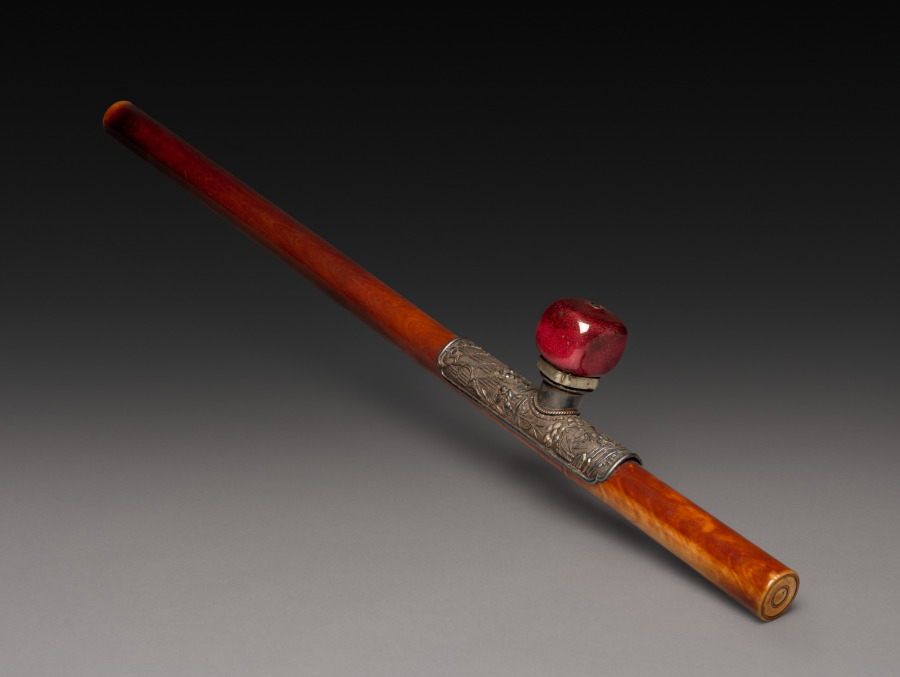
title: Opium Pipe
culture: China, Qing dynasty (1644-1911)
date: 1800s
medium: ivory with silver repoussé decoration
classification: Miscellaneous